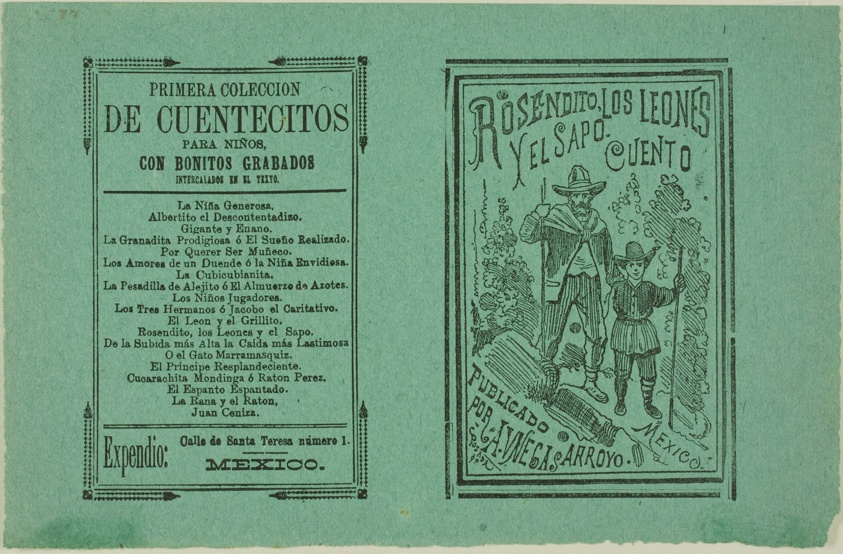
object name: Print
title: Little Rosen, the Lions, and the Toad. A Tale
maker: José Guadalupe Posada (Mexican, 1852-1913)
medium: Relief engraving on zinc on paper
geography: Mexico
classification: relief etching; print; prints and drawing